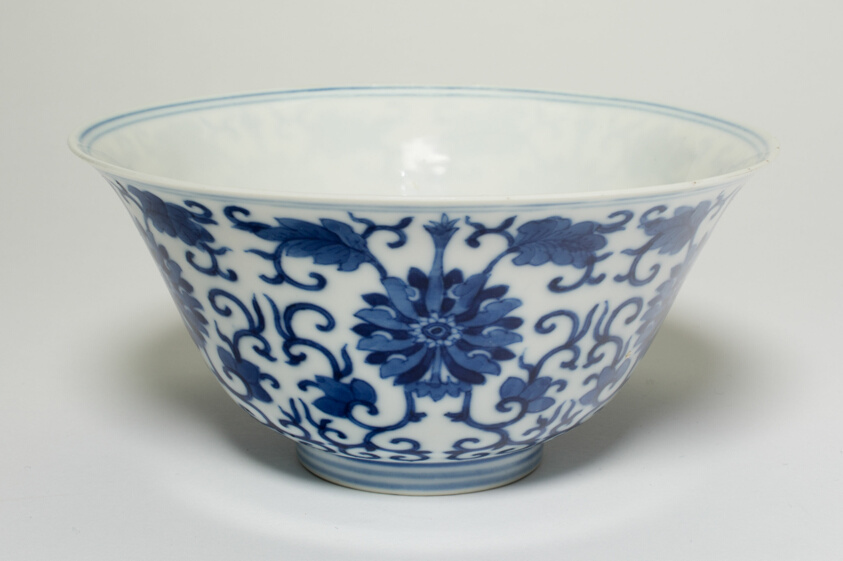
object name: Vessel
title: Bowl with Floral Scrolls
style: Chinese (culture or style)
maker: China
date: Qing dynasty (1644–1911), Guangxu reign mark and period (1875–1908)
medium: Porcelain painted in underglaze blue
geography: China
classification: bowl; porcelain; dish (vessel); ceramics; asian art; vessel